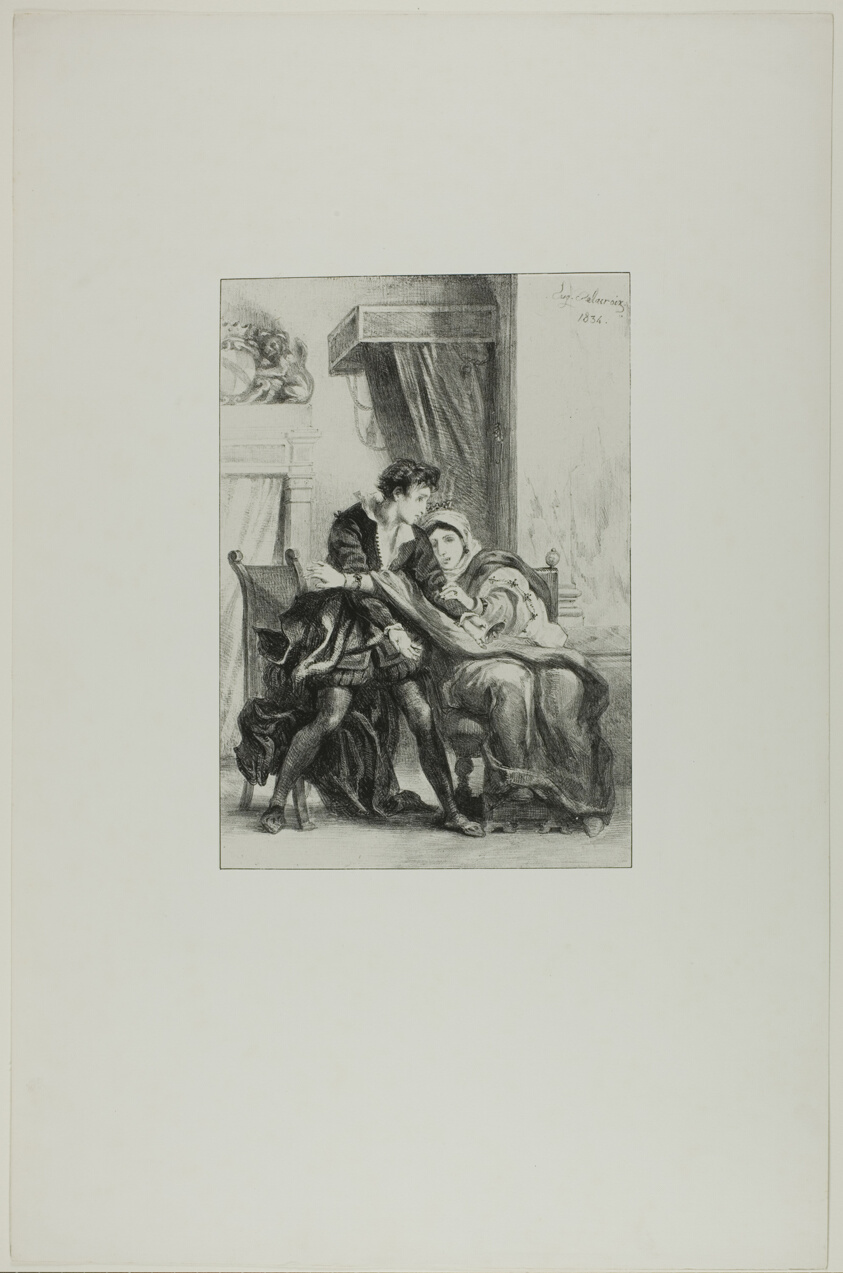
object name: Print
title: Hamlet and the Queen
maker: Eugène Delacroix (French, 1798-1863)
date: 1834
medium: Lithograph in black on off-white China paper laid down on white wove paper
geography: France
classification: lithograph; print; prints and drawing